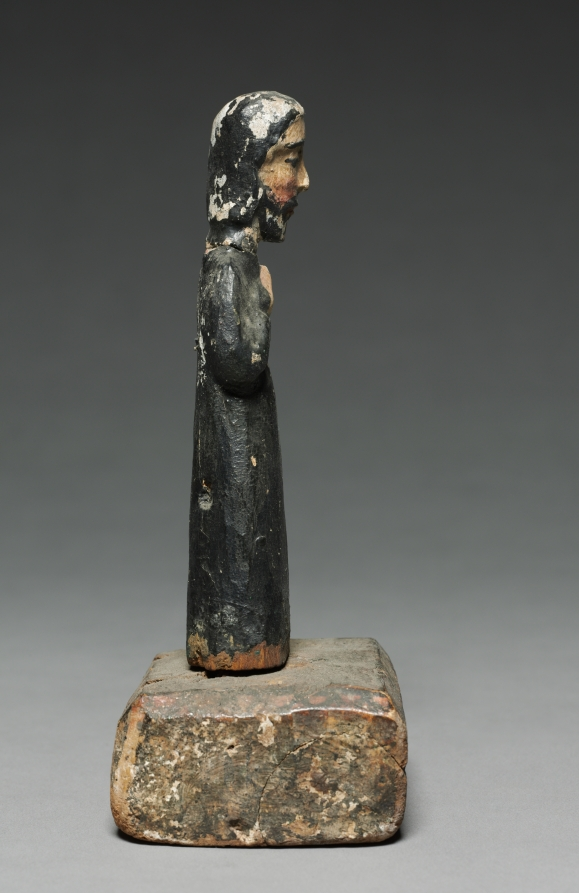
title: San Antonio: santo de bulto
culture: America, New Mexico, 17th-18th century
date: 17th-18th Century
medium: painted wood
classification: Sculpture